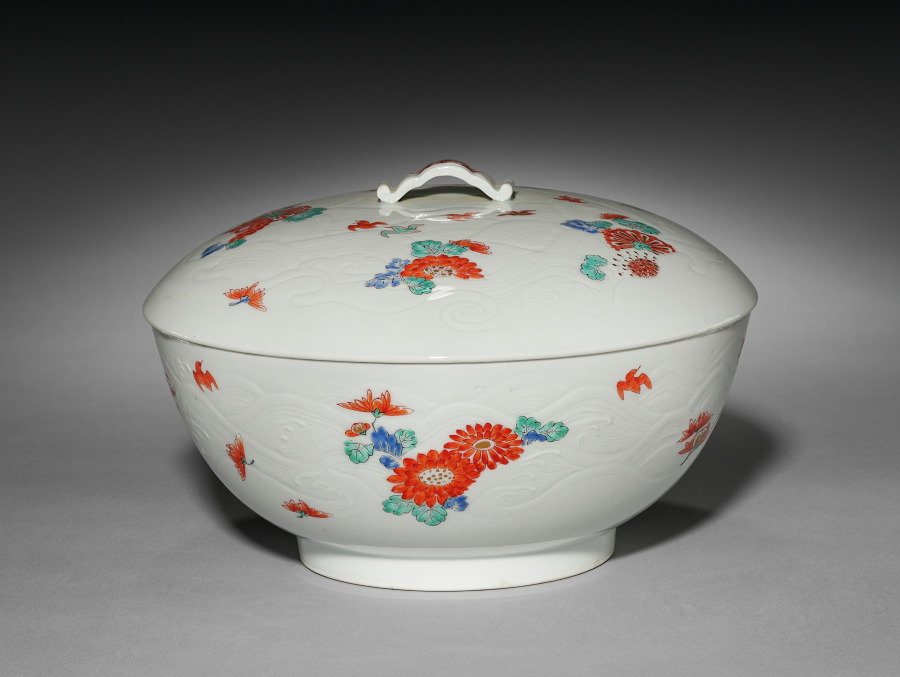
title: Covered Bowl with Chrysanthemums and Chidori: Kakiemon Ware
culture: Japan, Edo period (1615–1868)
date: early 1700s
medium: porcelain with decoration in colored enamels; molded design of waves on exterior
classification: Ceramic